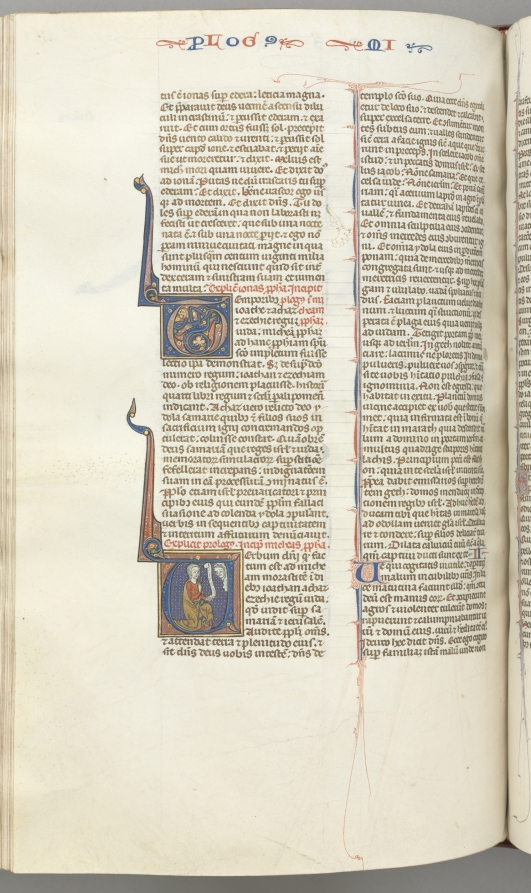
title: Fol. 358v, Micah, historiated initial V, Micah kneeling, bust of God above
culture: Southern France, Toulouse(?), 13th century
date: c. 1275–1300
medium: ink, tempera and gold on vellum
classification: Bound Volume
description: Biblical manuscripts were highly prized and important possessions of churches, monasteries, cathedral schools, and universities throughout medieval Europe. The biblical texts were known as the vulgate, the translations made by Saint Jerome in the fourth century from Hebrew and Greek into Latin, which became the definitive and official Latin version of the Roman Church. In the 13th century, the bible was, for the first time, produced as a single volume with an officially sanctioned sequence to its books and chapters as illustrated by this example. The very extensive decoration of this bible is arranged hierarchically to indicate the relative importance of the various texts so that full or almost full-page initials mark the openings of the first prologue, Genesis, and the first Gospel; historiated initials mark the beginning of each book and illuminated initials mark the Prologues.